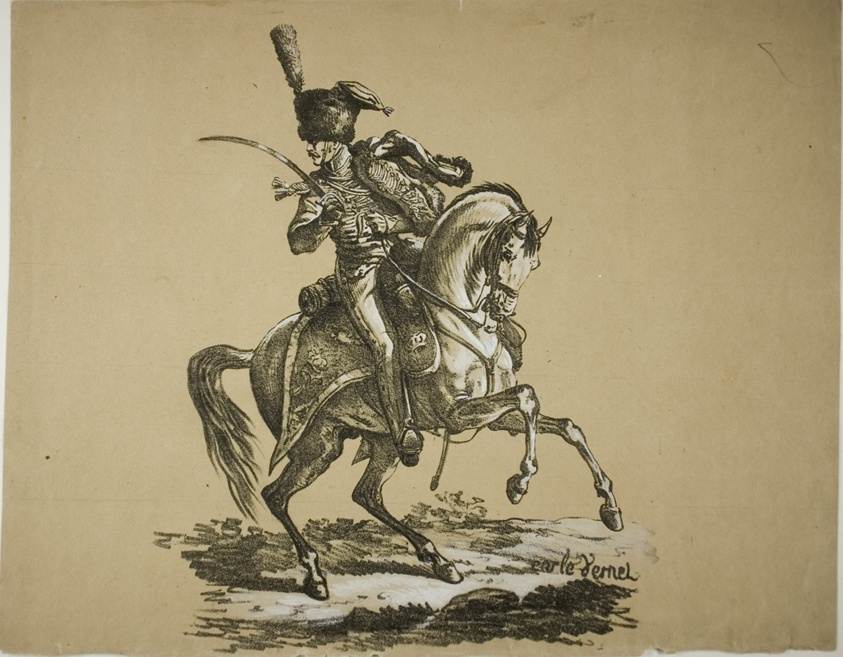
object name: Print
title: Royal Guard, Mounted Hussard and Horse, No. 6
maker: Carle Vernet (French, 1758-1836); printed by Comte de Charles Philibert Lasteyrie du Saillant (French, 1759-1849)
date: c. 1818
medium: Lithograph in black, hand-colored and heightened with Chinese white, on tan wove paper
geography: France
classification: lithograph; print; prints and drawing